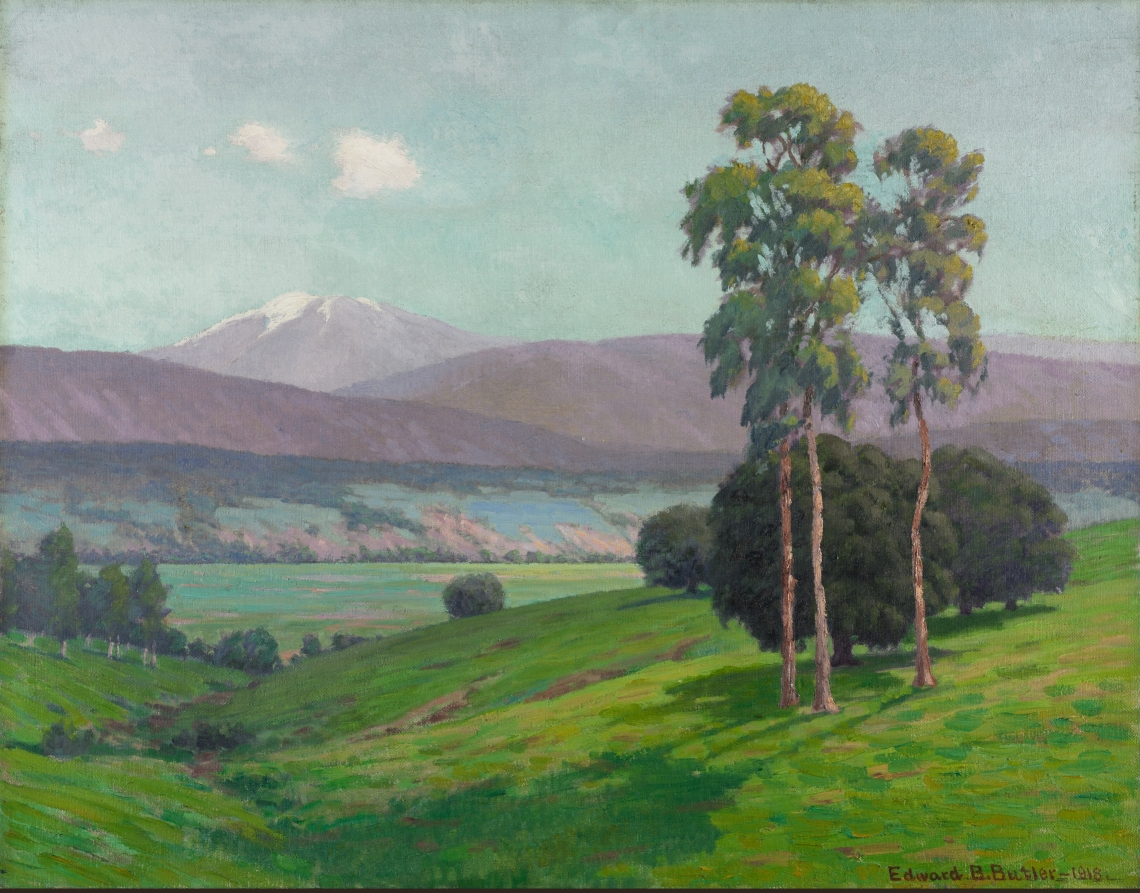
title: Early Spring, California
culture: America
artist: Edward B. Butler (American, 1853–1928)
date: 1918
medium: oil on canvas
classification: Painting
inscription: Signed lower right: Edward B. Butler - -1918